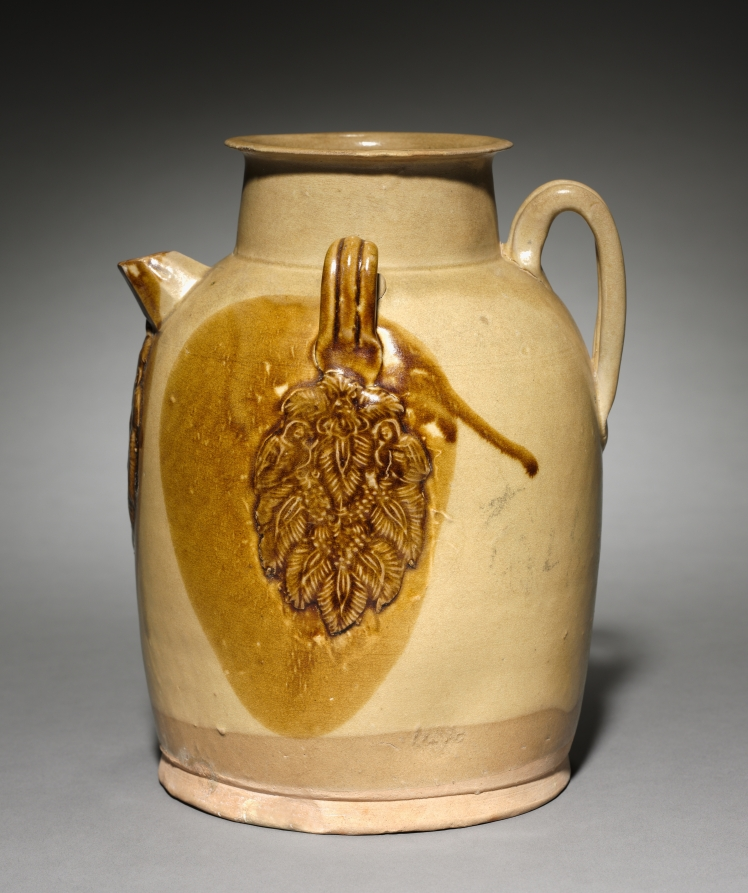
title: Ewer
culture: China, Hunan province, Tongguan, Tang dynasty (618–907)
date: 800s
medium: glazed stoneware with molded and applied decoration, Changsha ware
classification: Ceramic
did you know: Molded clay medallions with a stylized double-bird-and-leaf pattern were applied below the two side loops and the spout.